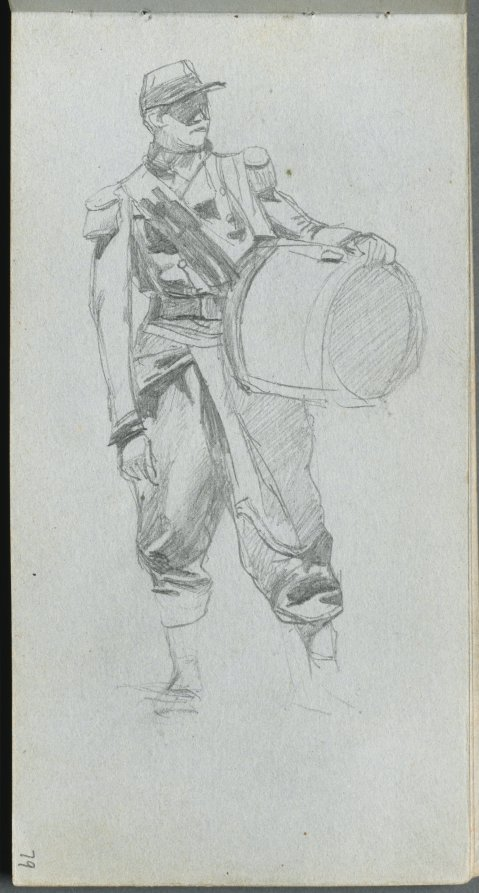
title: Sketchbook, page 79: Soldier with Drum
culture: France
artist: Ernest Meissonier (French, 1815–1891)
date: c. 1860s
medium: graphite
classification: Bound Volume